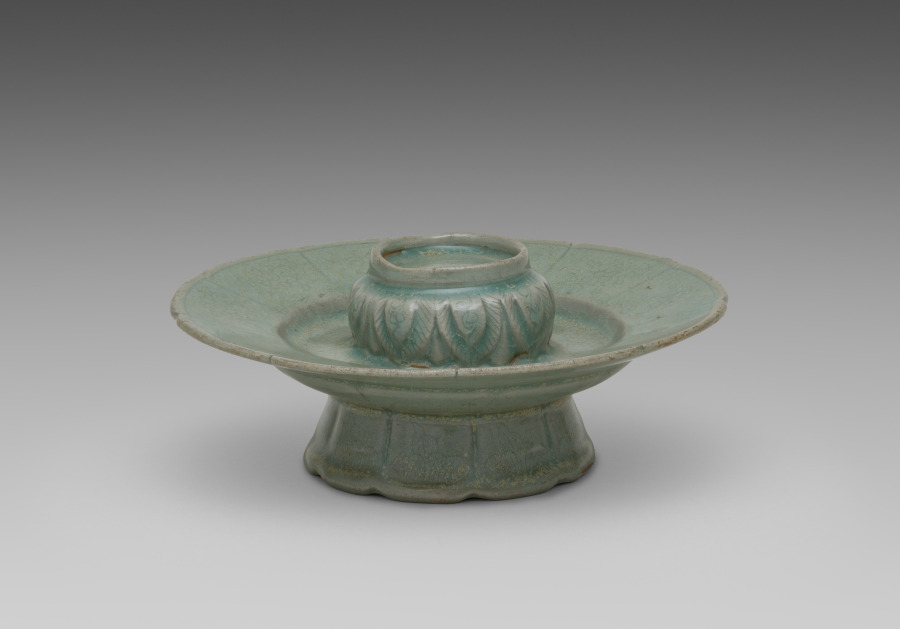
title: Floral-shaped Cup Stand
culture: Korea, Goryeo dynasty (918–1392)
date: 1200s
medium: pottery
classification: Ceramic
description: As early as the seventh century, the practice of drinking tea became an important part of elite culture in Korea. In enjoying teas, elites commissioned a variety of types of utensils and vessels including this delicate-looking cup stand, not only to make their tea-drinking experience more exciting, but also to show their refined taste.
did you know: Elites of the Goryeo period are known for their love of drinking tea and wine. This type of delicate-looking cup stands not only made their drinking experience more enjoyable, but also showed their refined taste.